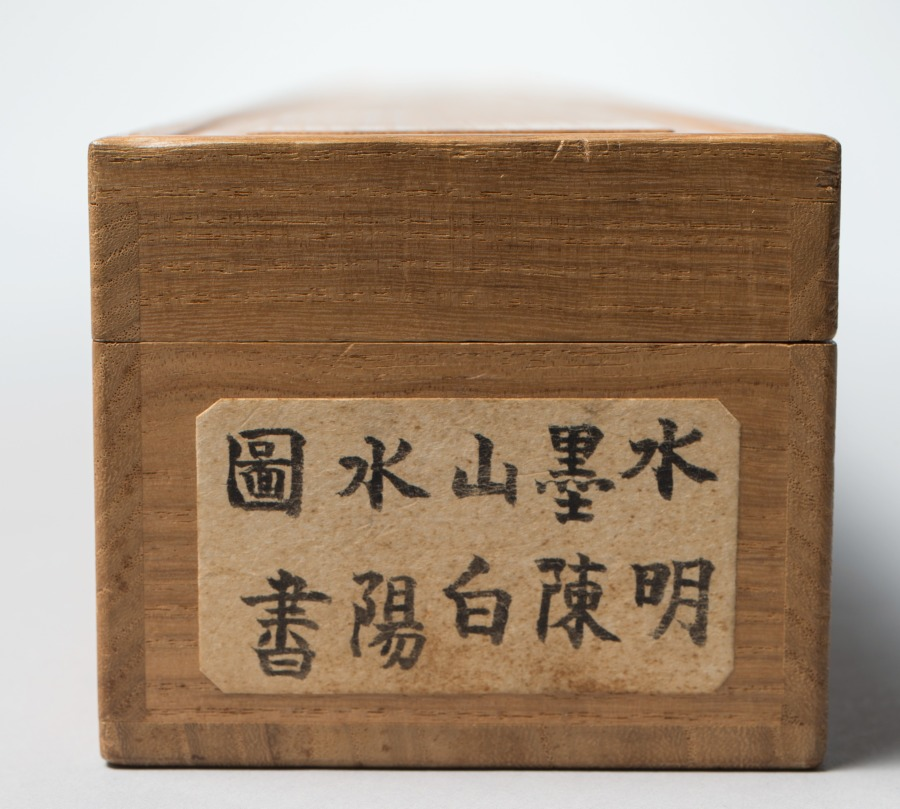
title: Looking for a Monastery in the Misty Mountains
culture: China, Ming dynasty (1368–1644)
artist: Chen Chun (Chinese, 1483–1544)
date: 1500–1544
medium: hanging scroll, ink on paper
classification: Painting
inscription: Artist's inscription, signature, and 2 seals: Row after row of misty trees envelop the Buddhist Monastery./ But the rustic who comes to find it will not lose his way./ Just across the wooden bridge, the dusty world is cut off;/ Among the countless falling petals, birds are singing confusedly. Daofu 道複 composed [this]. [seals] Fufu shi 復甫; Baiyang shanren 白陽山人. trans. WKH/LYSL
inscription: 3 additional unidentified seals.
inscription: 1 additional unidentified seal on the back of the mounting.